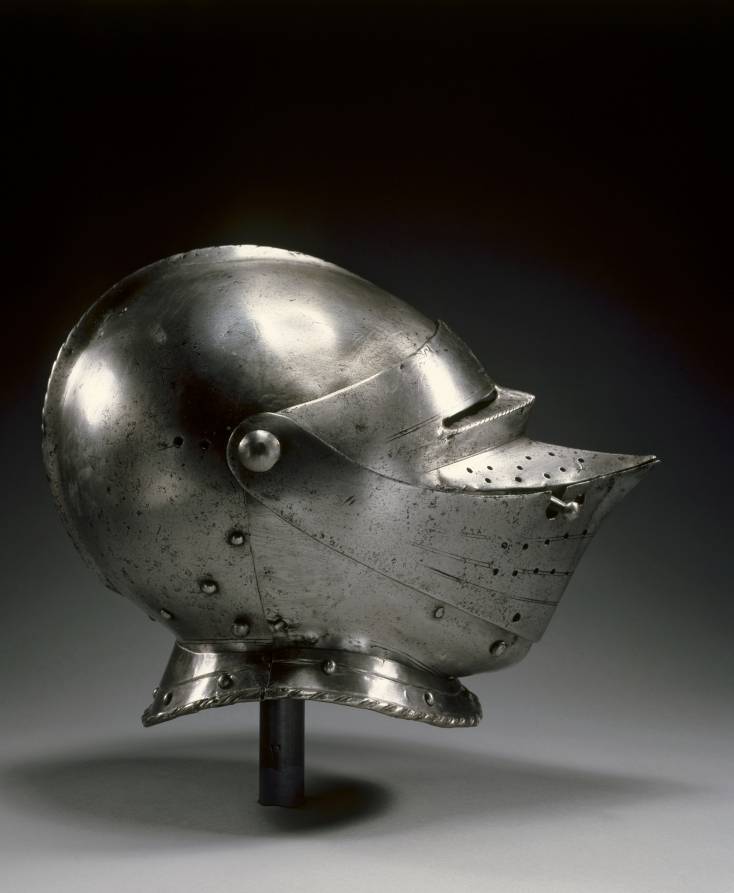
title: Close Helmet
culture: Germany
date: c. 1510–30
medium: steel with black paint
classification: Arms and Armor